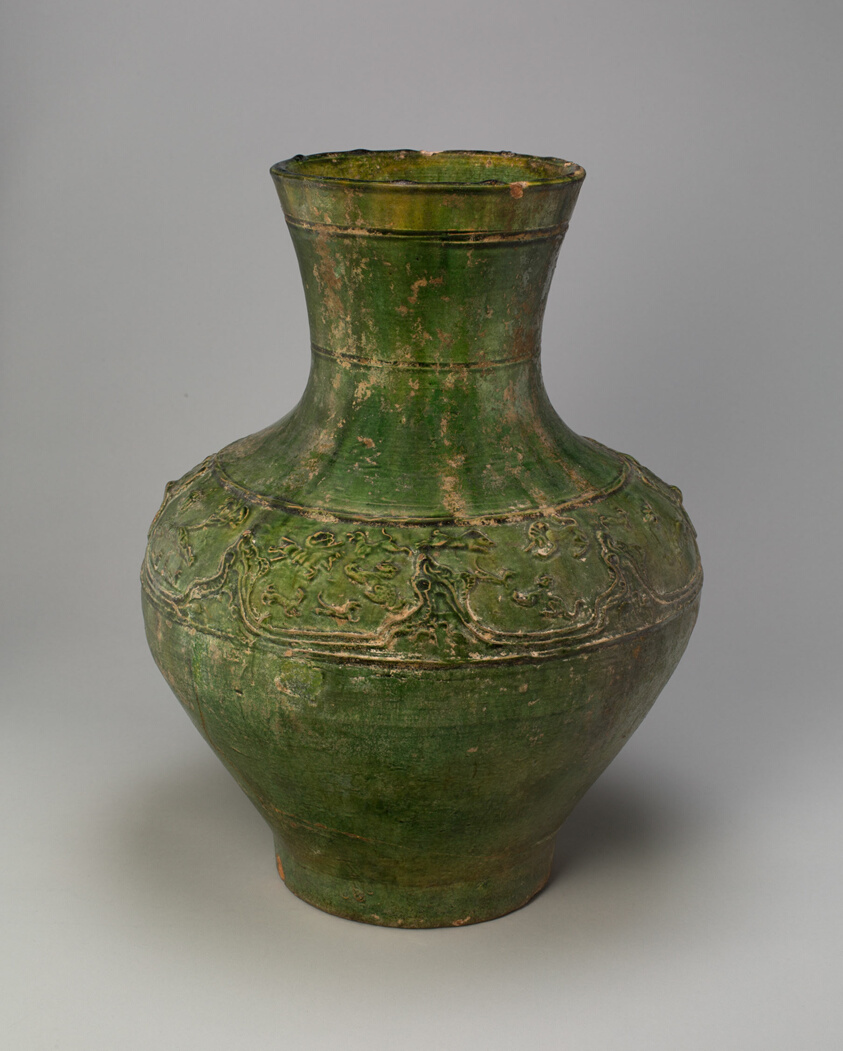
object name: Vessel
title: Jar (Hu) with Equestrians and Animals amid Mountains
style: Chinese (culture or style)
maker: China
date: Han dynasty (206 B.C.–A.D. 220)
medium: Earthenware with lead glaze and underglaze molded relief decoration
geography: China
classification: earthenware; asian art; ceramics; vessel